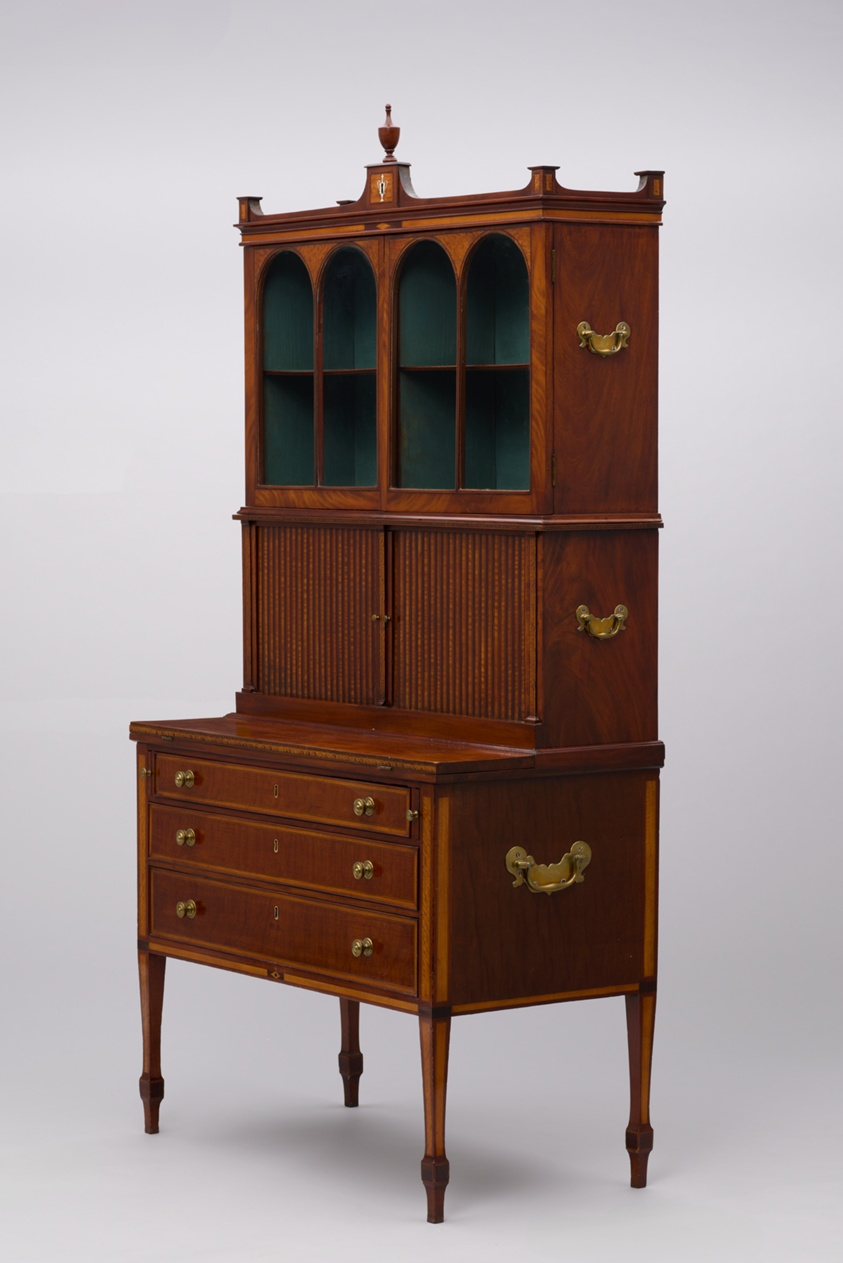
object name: Furniture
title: Tambour Desk and Bookcase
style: federal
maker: Attributed to the workshop of John and Thomas Seymour (American, active 1793–1804); Or attributed to the workshop of Thomas Seymour (American, active 1804–1817); Boston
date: c. 1800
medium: Mahogany, satinwood, white pine, cherrywood, chestnut, with brass, ivorine, and leather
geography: Boston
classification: furniture; american arts; american decorative arts; bookcase; decorative arts; desk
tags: furniture, cabinets, shelves, drawer, locks, keys, bookcase, decorative arts, desk, escutcheons